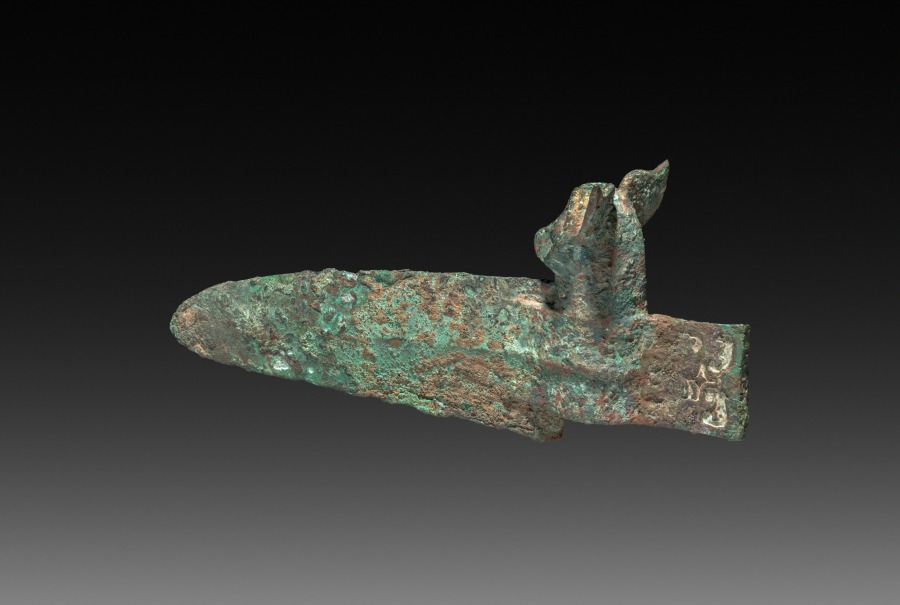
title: Axe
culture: China, Shang dynasty (c. 1600–c. 1046 BCE)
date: 1766–1045 BCE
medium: bronze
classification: Metalwork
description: The head of an owl with large eyes and ears, sitting above the blade of a halberd-axe, may have deterred evil and harm from its carrier. Whether such an axe was used in ritual or warfare is not clear.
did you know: A staff or pike would have attached to the blade via the socket below the owl's head.